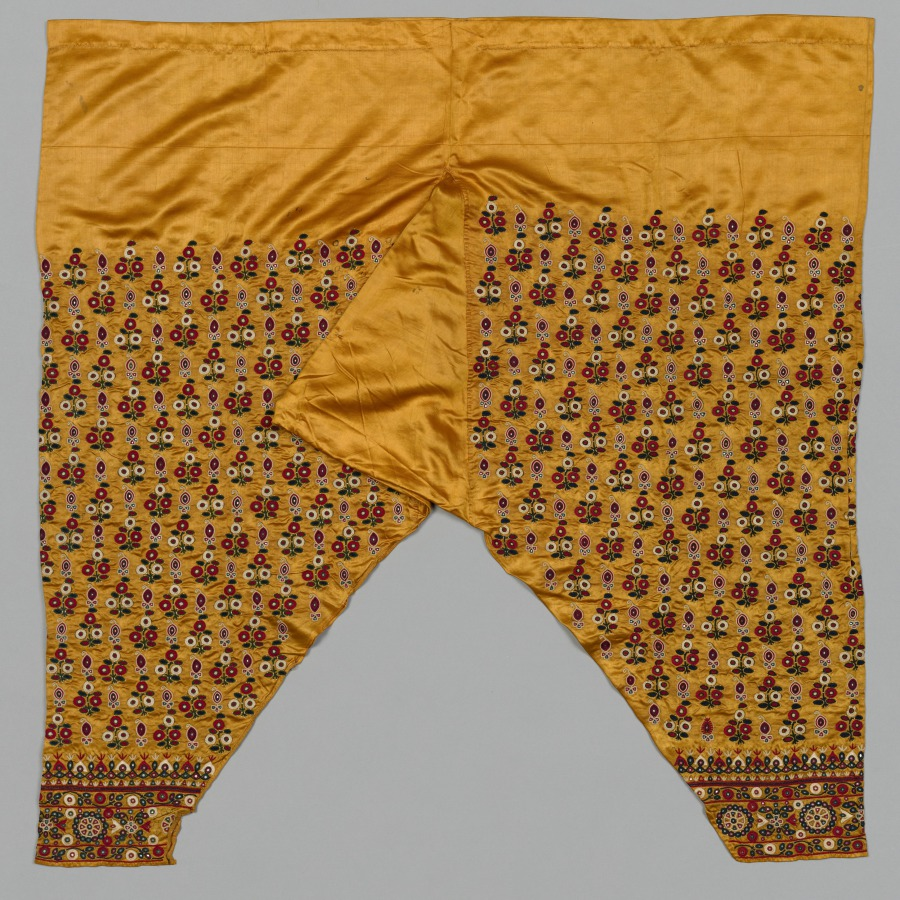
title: "Salwar": Woman's Trousers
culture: Western India, Gujarat, Kachchh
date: 1800s–early 1900s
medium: silk on silk satin with mirror-glass inserts, embroidery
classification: Garment